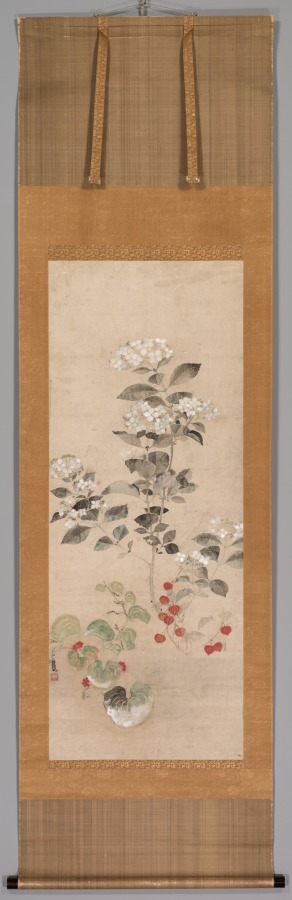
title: Summer Flowers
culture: Japan, Edo period (1615–1868)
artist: Kitagawa Sōsetsu (Japanese, active 1639–50)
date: mid-1600s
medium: hanging scroll; ink, color, and gold on paper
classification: Painting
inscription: 法橋相説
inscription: Seal: 印年 (Inen)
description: White hydrangea, orange-colored demon’s lantern, and greenbrier vine appear together in this scroll. The artist used the dripping-in (tarashikomi) technique to create a sense of depth and dimension in the leaves of the plants. A carefully controlled brush loaded with a high ratio of water to ink or color is key to the success of this brush method. Gold lines indicate the veins of leaves and the seams of pods.